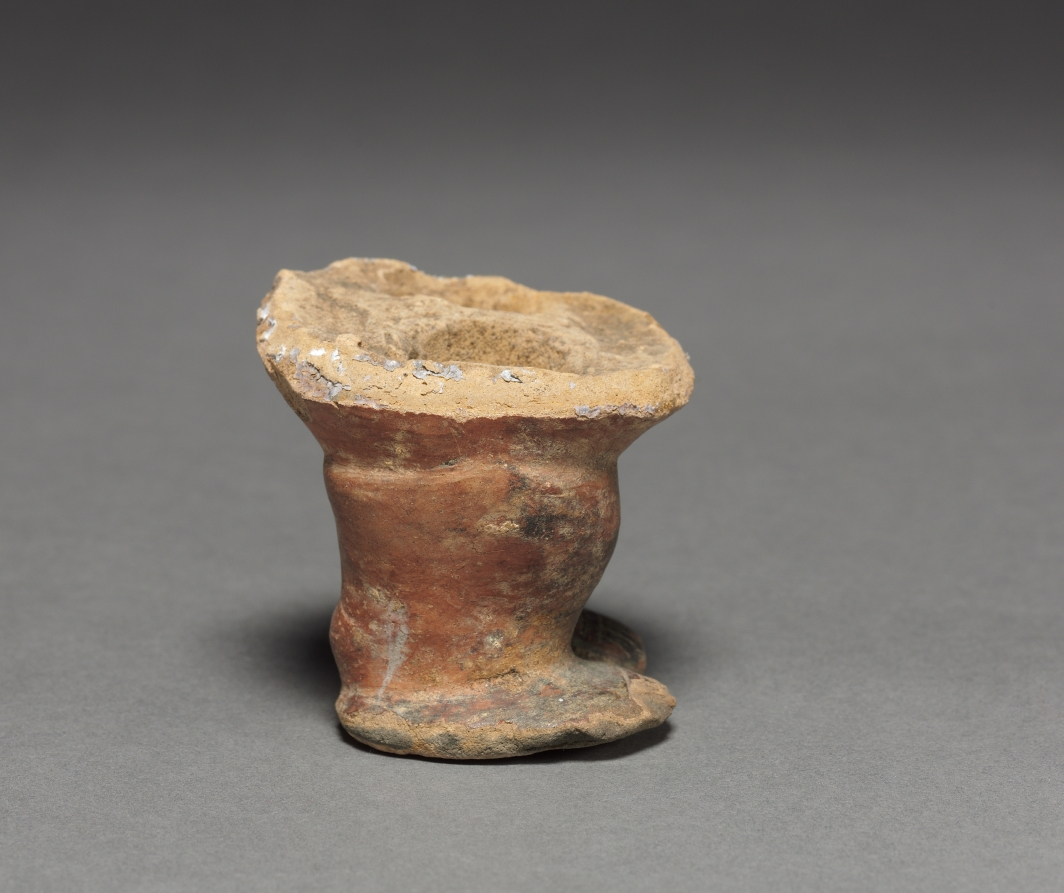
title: Jar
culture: Colombia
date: before 1550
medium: black ware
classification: Ceramic